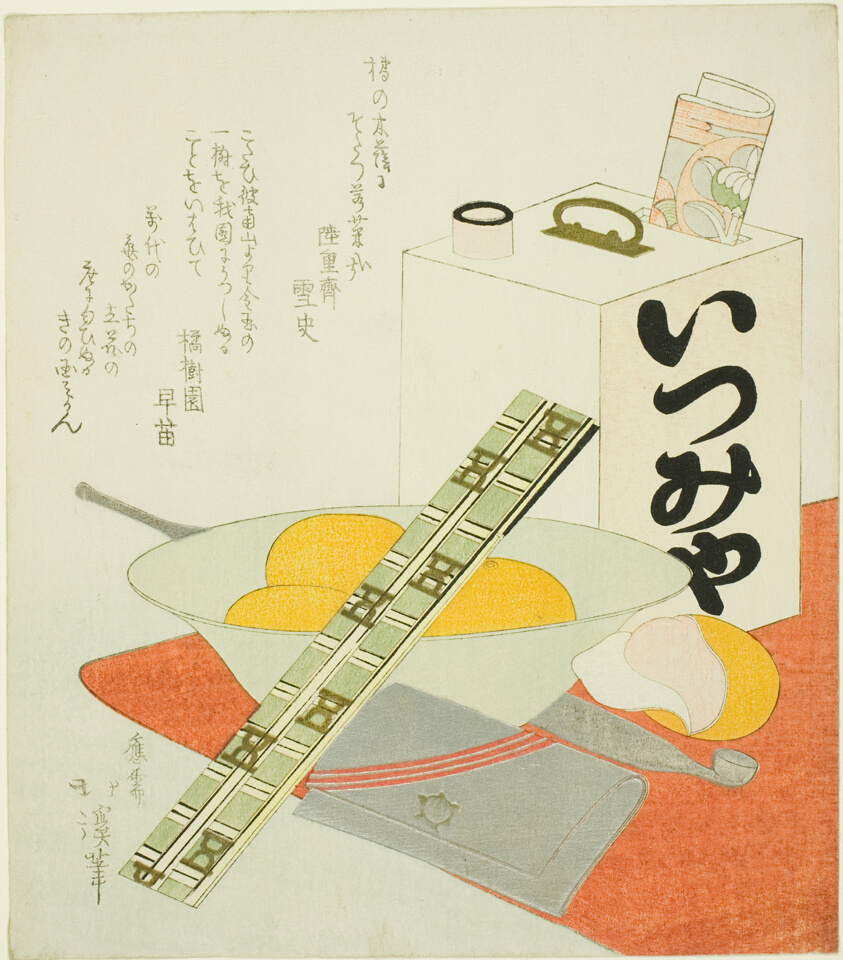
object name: Print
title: The Theater Outing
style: Japanese (culture or style)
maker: Totoya Hokkei (Japanese, 1780–1850)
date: mid–1820s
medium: Color woodblock print with metallic pigments; surimono shikishiban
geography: Japan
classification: woodblock print; print; asian art